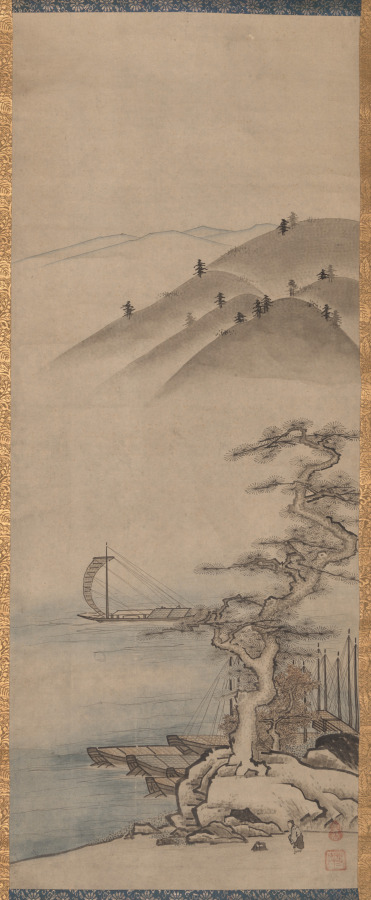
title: Landscapes (one of a pair)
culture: Japan, Edo period (1615–1868)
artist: Unkoku Tōyo (Japanese, 1612–1688?)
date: mid- to late 1600s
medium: hanging scroll; ink and light color on paper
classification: Painting